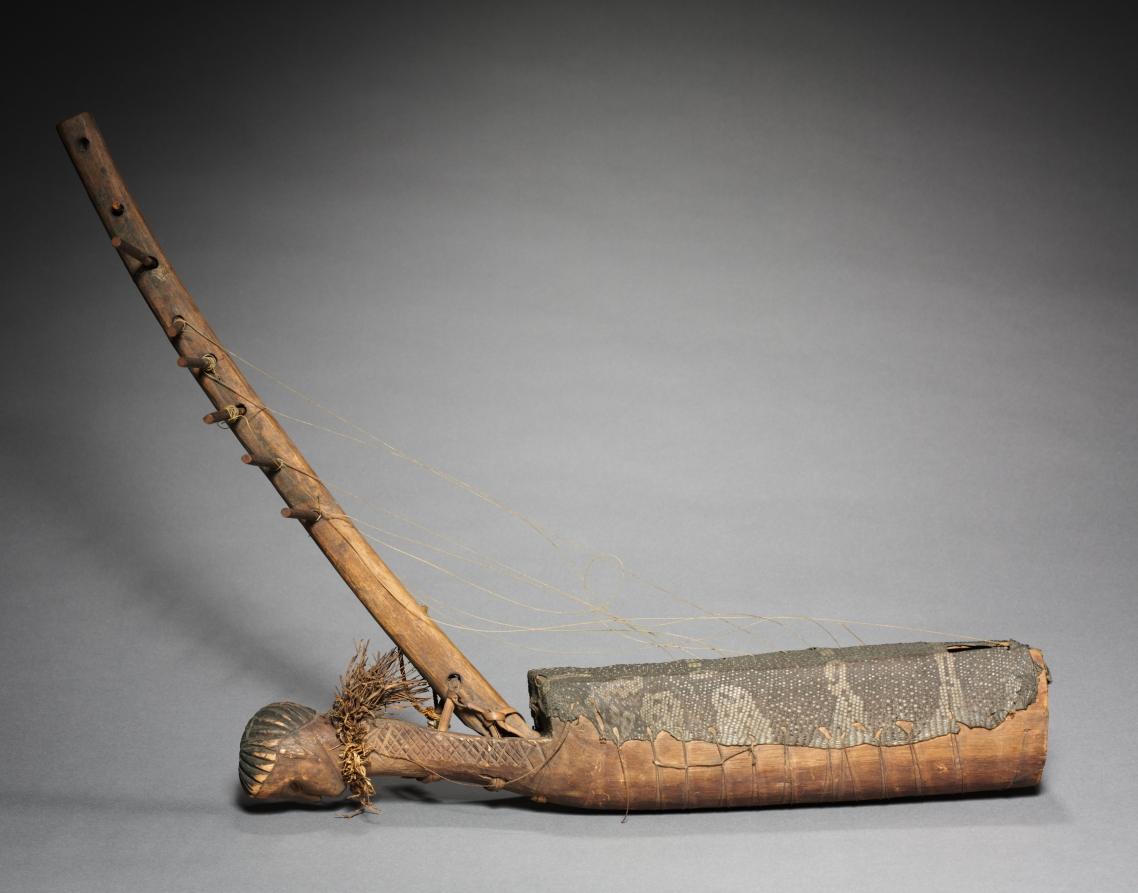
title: Harp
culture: Africa, Central Africa, Democratic Republic of Congo, unknown maker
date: 1900s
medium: Wood, snakeskin, plant fiber, cane, string, and colorant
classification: Musical Instrument